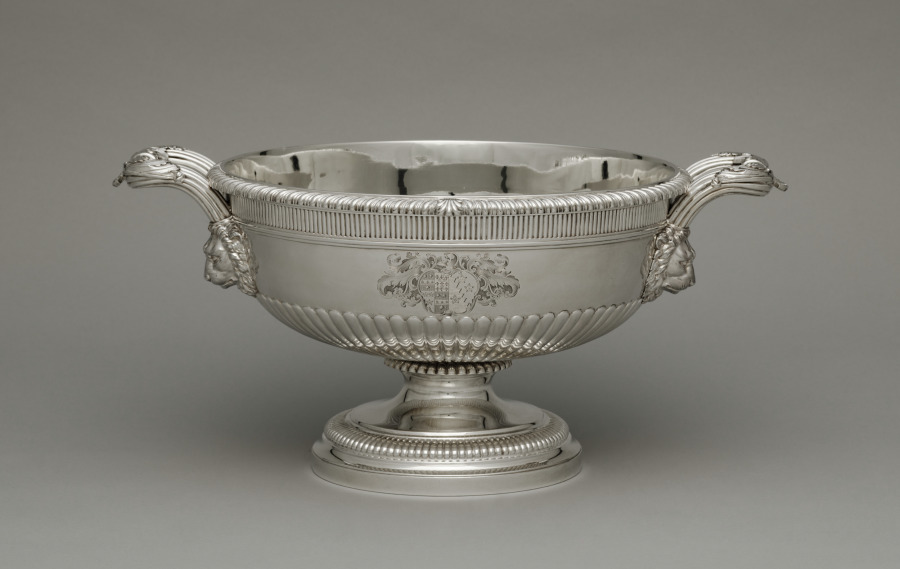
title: Tureen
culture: England, London, 19th century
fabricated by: Paul Storr (British, 1771–1844)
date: 1812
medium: silver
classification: Silver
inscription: coat of arms: Hutton impaling Chaytor; crest: Hutton. (Arms of Timothy Hutton (1729-1864) of Marske and Clifton Castle, Yorkshire, and his wife Elizabeth Chaytor of Spennithorne Hall, who were married in 1804.)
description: Silver fulfilled a prominent role in projecting wealth, status, power, and ritual in British life during the 1600s and 1700s. Elaborate forms such as this tureen, with its acanthus leaves and fluted detailing, not only represented wealth in its sheer silver weight but also provided royal and aristocratic owners a surface for displaying engraved coats of arms. The arms of the High Sheriff of Yorkshire, Timothy Hutton and his wife Elizabeth Chaytor of Spennithorne Hall in northern England are engraved on this tureen by Paul Storr, one of the most prominent London silversmiths of the period.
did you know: This tureen is accompanied by a cover and stand. See cover record.